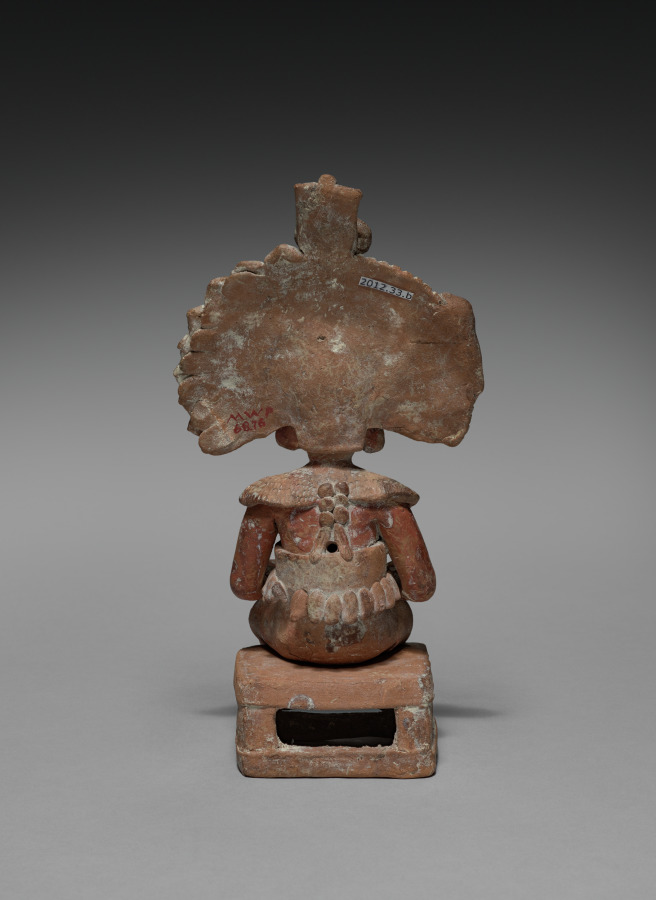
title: Seated Lord with Removable Headdress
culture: Mesoamerica, Maya, probably Jaina Island, Late Classical period, 7th-9th century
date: 600–800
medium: ceramic and slip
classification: Ceramic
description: The major Maya grave offerings on Jaina Island were ceramic figurines that depict deities and humans in a variety of roles. The standing figure represents a warrior who once probably held weapons and wears either quilted cotton armor or the feathered uniform of a military order. The seated figure also represents a male, perhaps another warrior, who wears a huge zoomorphic headdress. A skeletal face with articulated jaw descends from the headdress to fit as a mask over the figure’s face.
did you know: It is estimated that some 20,000 people were buried on the tiny island of Jaina over a 500-year period.